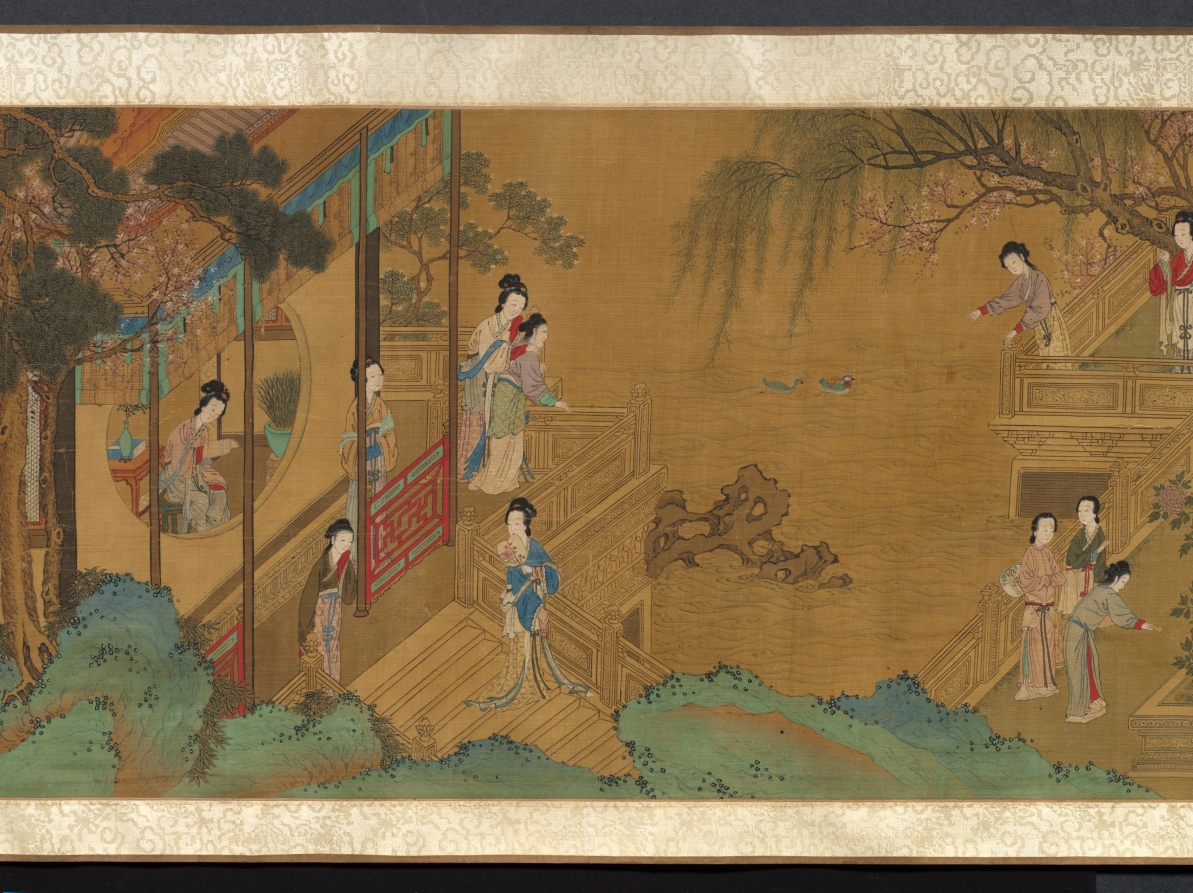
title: Palace Ladies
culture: China, Qing dynasty (1644-1911)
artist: copy after Qiu Ying (Chinese, 1494–1552)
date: 1644–1911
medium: handscroll, ink and color on silk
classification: Painting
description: This handscroll illustrates the pursuits of court ladies in a palace precinct on a spring day. Women, young girls, and their maids amuse themselves by sitting on a swing, playing games, watering and admiring peonies, performing music together, playing the qin (zither), feeding a parrot on the balustrade and fish in the water, or catching butterflies. The life of elite women was mostly restricted to the so-called inner quarters, meaning the garden and inner courts of the house. This painting idealizes the world of young palace girls that in fact was often filled with boredom and waiting for a lover.